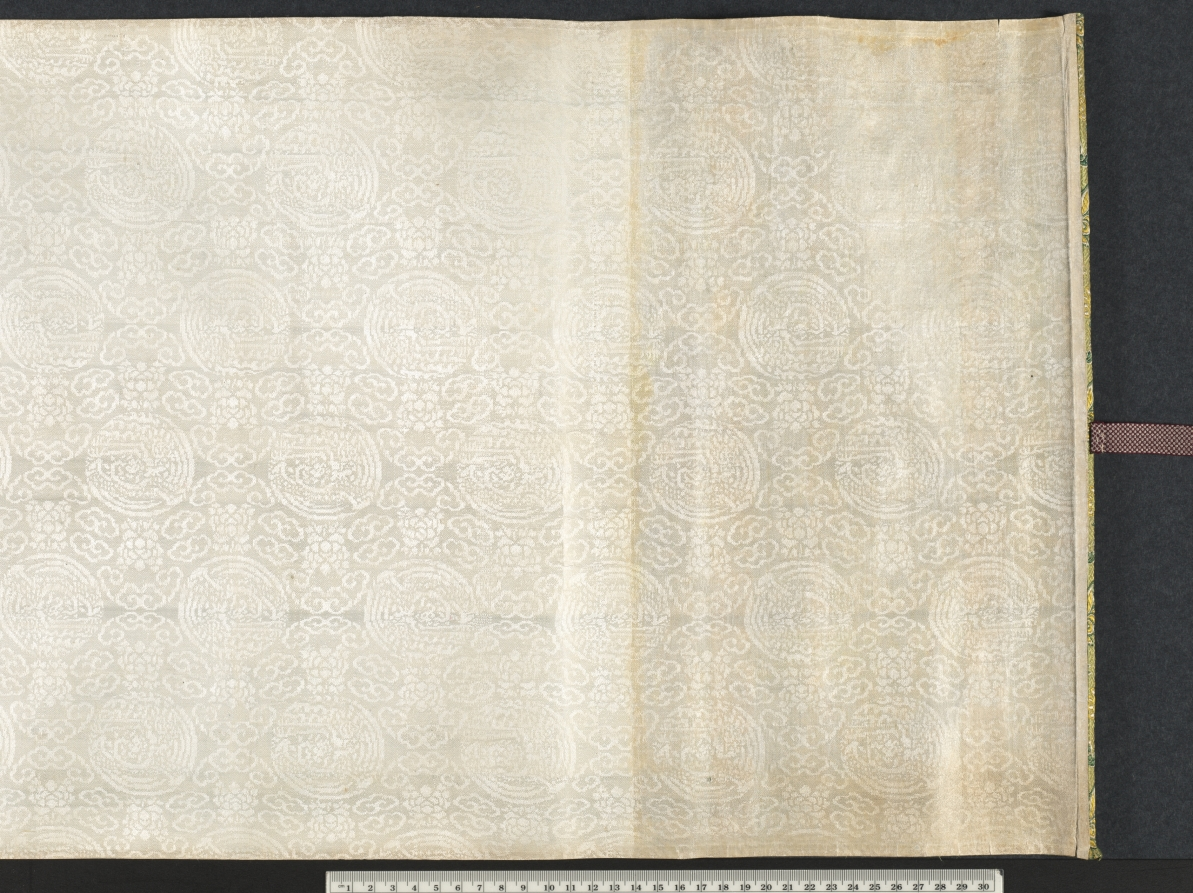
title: Cleansing Medicinal Herbs in the Stream on a Spring Day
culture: China, Qing dynasty (1644-1911)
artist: Yu Zhiding (Chinese, 1647–c. 1716)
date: 1703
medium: Handscroll; ink and color on silk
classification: Painting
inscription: Title by Chen Yixi.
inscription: 姑射仙人冰雪膚，新詩傳唱滿通都。/ 極知遲暮難為別，更展春泉洗藥圖。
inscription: Colophon by Chen Tingjing 陳廷敬 (1639–1712). Colophon by Wang Hongxu 王鴻緒 (1645–1723), dated 1707. Colophon by Song Luo 宋犖 (1634–1714). Colophon by Liu Yan 劉巗. Colophon by Jing Xikui 涇西夔. Colophon by Liu Yan 劉巗. Colophon by Cao Yin 曹寅. Colophon by Wang Shihong 汪士鋐. Colophon by Wang Shidan 王式丹 (1645–1718), dated 1712. Colophon by Shi Shenyi 史申義 (1661–1712), dated 1712. Colophon by Yin Yuqing 殷餘慶, dated 1712.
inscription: Colophon by Chen Shixia 陳時夏, dated 1729.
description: A famous portraitist, Yu Zhiding here depicts the likeness of Shi Shenyi 史申義 (1661–1712), an official and poet. Master Shi, a sickly man, was deeply interested in medicinal science. The opening section of the scroll features a boy washing a fungus in fresh spring water, a basket of medicinal herbs by his side. Other servants carry a fan, a bundle of scrolls, and a cup of tea or hot wine. Master Shi sits in a bamboo grove, surrounded by fields of herbs. Returning swallows, pink peach blossoms, and blooming magnolia indicate spring, whereas the fungus conveys wishes for long life. The spring theme may express the artist’s wish for his friend’s recovery.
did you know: In the pavilion are some of Shi Shenyi’s scholarly accoutrements: a stack of books, an antique zun 尊 (wine vessel), a brush holder, an ink stone, and a small chime.